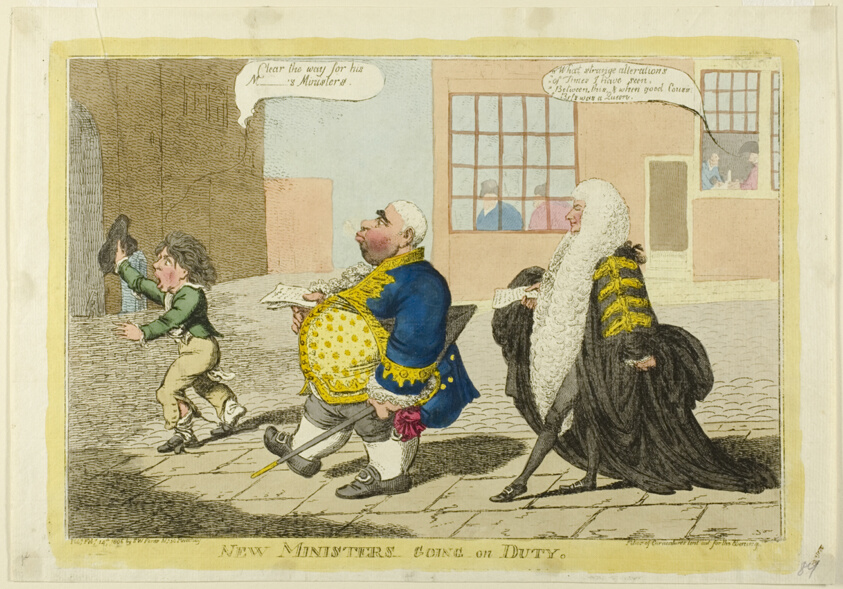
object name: Print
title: New Ministers Going on Duty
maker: Charles WIlliams (English, active 1797-1830); published by S. W. Fores (English, active 1785-1825)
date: published February 14, 1806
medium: Hand-colored etching on ivory laid paper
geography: England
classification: etching; print; prints and drawing